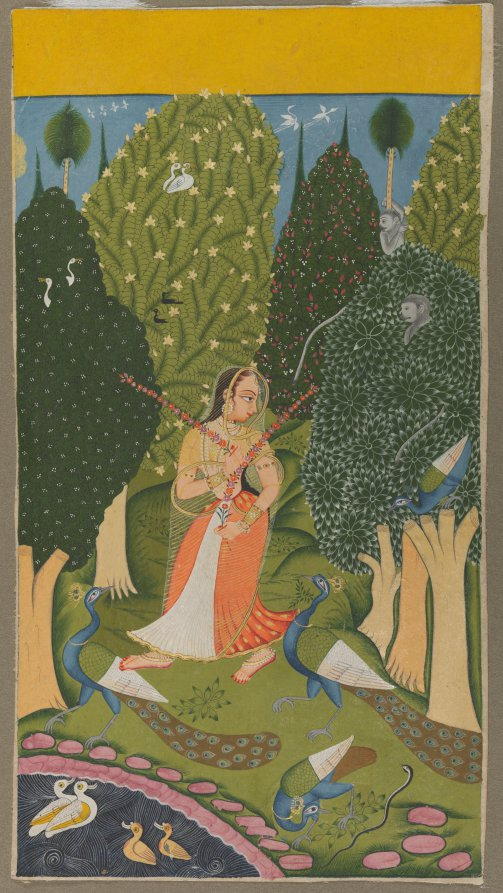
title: Gaudi Ragini, page from a Ragamala series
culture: India, Rajasthan, possibly Raghugarh school, late 18th Century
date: c. 1780–1800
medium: Gum tempera, ink, and gold on paper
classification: Painting